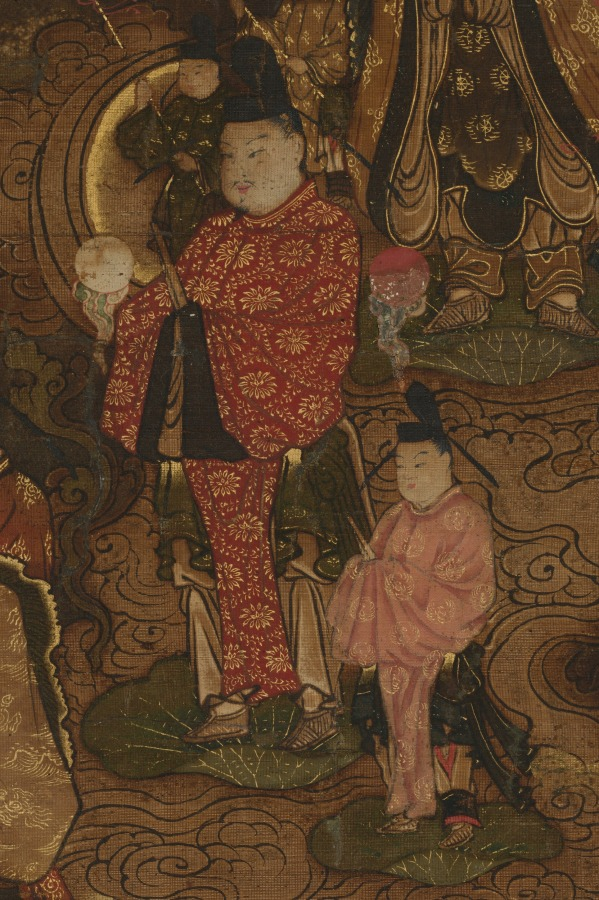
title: Descent of the Nine Luminaries and the Seven Stars at Kasuga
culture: Japan, Nanbokuchō period (1336–92)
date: mid- to late 1300s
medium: Hanging scroll; ink, color, gold and cut gold on silk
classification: Painting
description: This medieval religious painting shows celestial beings descending from the heavens into the Kasuga Shrine, a major religious site in Japan's ancient capital, Nara. The moon and the Kasuga mountain range appear in the uppermost portion of the painting, as does a red shrine entrance gate, or torii. In the upper part of the painting, figural representations of the stars in the constellation known as the Big Dipper in the West descend from right to left on cloud banks. In the lower part, the Nine Luminaries (Sanskrit: Navagraha) that emerged from the Vedic tradition—the sun and moon; the planets Jupiter, Mars, Saturn, Venus, and Mercury; and personifications of the fluctuating lunar nodes—descend in similar fashion. The painting uses the "deities in descent" scheme originating in China, as well as the original Buddhist form mandala (Japanese: honjibutsu mandarazu) format prevalent in medieval Japanese Shinto-Buddhist painting, to generate an image connected to the worship of celestial bodies in Esoteric Buddhism.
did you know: A 19th-century copy of this painting in ink and light color exists at the Kyoto City University of Arts.